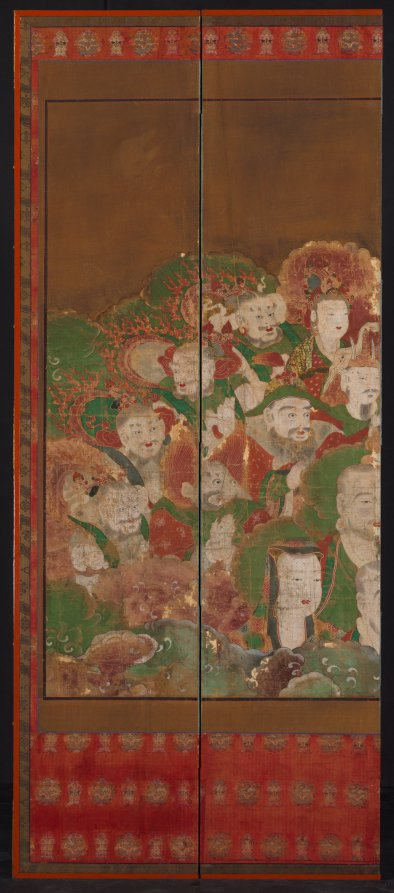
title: Buddhist Deities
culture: Korea, Joseon dynasty (1392–1910)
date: 1700s–1800s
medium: Four-panel folding screen; ink and color on silk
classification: Painting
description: This painting is a fragment of a much larger banner painting, now preserved by mounting on a four-panel continuous folding screen. On the back are Buddhist sutra pages, with text written in gold ink on indigo dyed paper.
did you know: This painting is a fragment of a much larger banner painting.